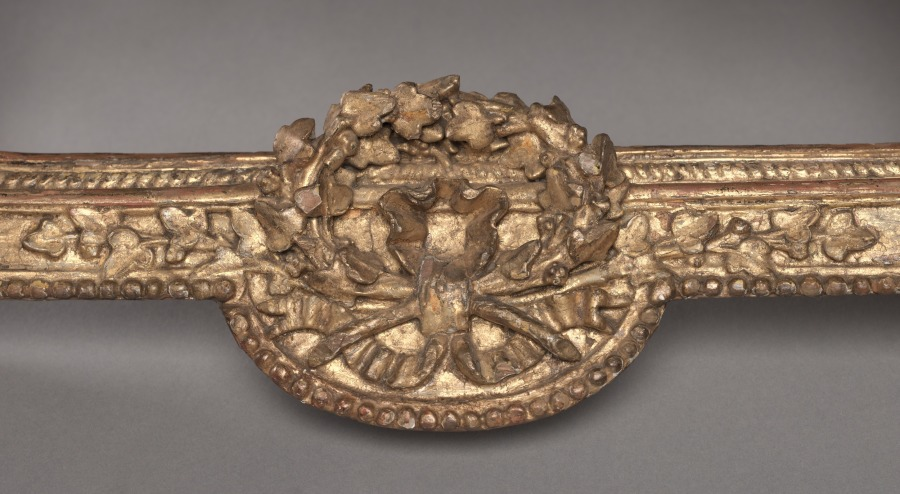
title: Stool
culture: France, 18th century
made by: Jean-Baptiste-Claude Sené (French, 1748–1803)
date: 1786–1787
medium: carved and gilded wood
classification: Furniture and woodwork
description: These stools were made for the gaming room of Marie-Antoinette at the Chateau de Compiègne and later placed in the Chateau de Fontainbleau.